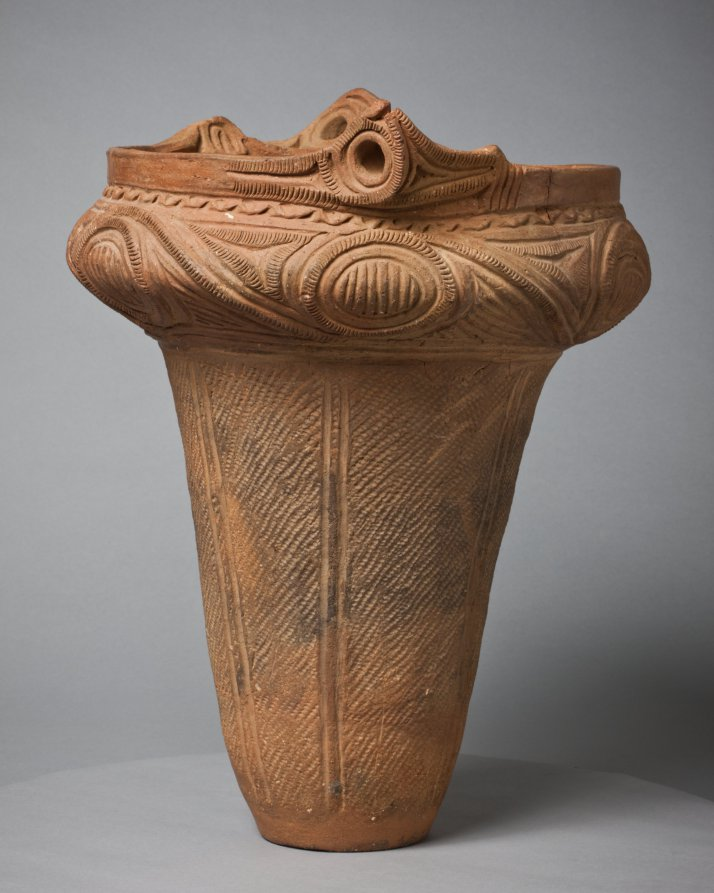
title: Urn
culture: Japan, Jōmon period (c. 10,500–300 BCE)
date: c. 2000 BCE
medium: earthenware, terracotta, impressed and incised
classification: Ceramic